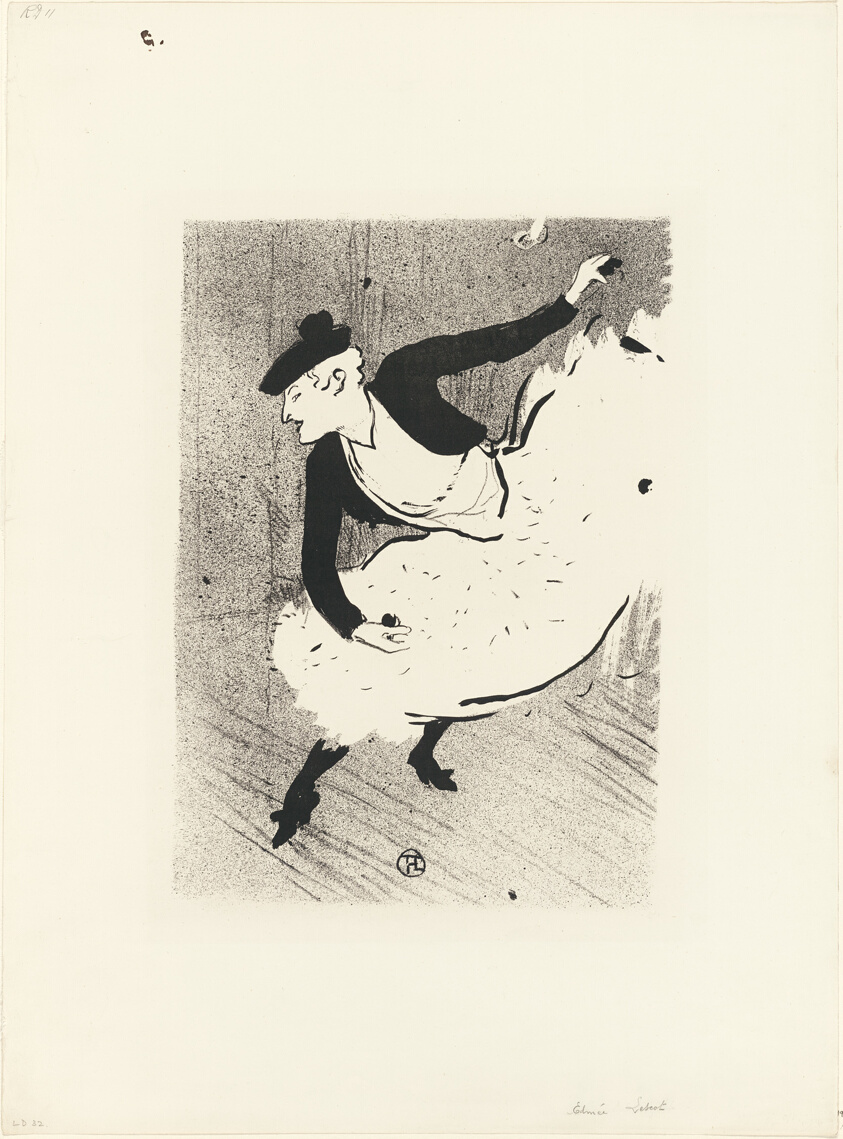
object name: Print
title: Edmée Lescot, from Le Café-Concert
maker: Henri de Toulouse-Lautrec (French, 1864-1901); printed by Edward Ancourt & Cie (French, 19th-20th c.); published by L'Estampe originale (French, 1893-1895)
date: 1893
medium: Lithograph on ivory wove paper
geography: France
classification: lithograph; print; prints and drawing